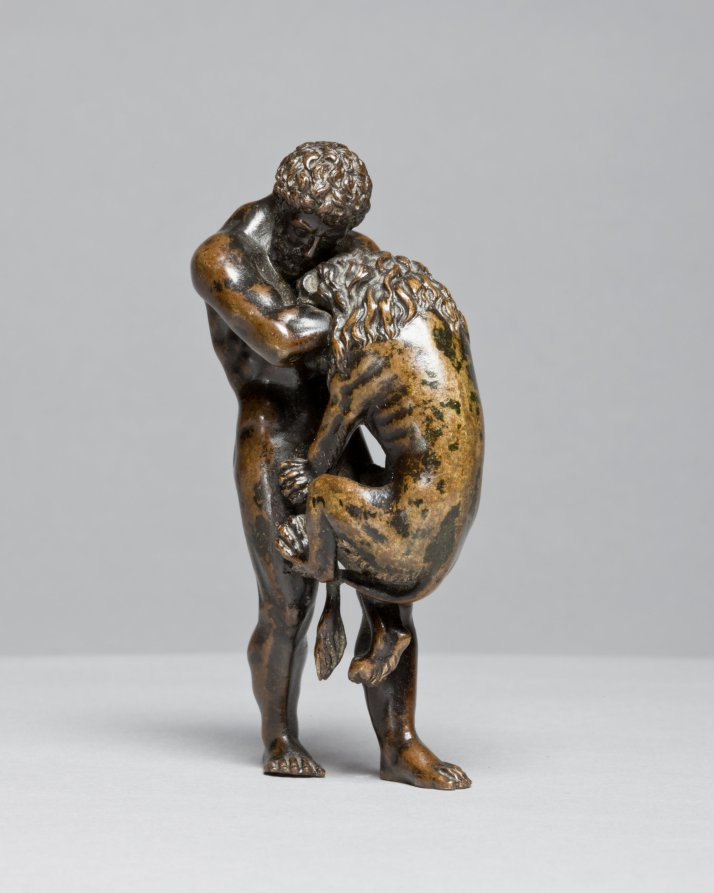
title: Hercules and the Nemean Lion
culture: Italy or France, 16th century or later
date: 1500s or later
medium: bronze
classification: Sculpture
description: The original owner of this work would have understood that this scene referred to the entire story of Hercules, the demi-god who had to accomplish twelve labors. The lion is named after the city of Nemea, near Corinth, a monstrous beast sent by the goddess Hera to wreak havoc on the area. After killing the lion, Hercules wore his pelt, commonly seen in other representations of the hero.